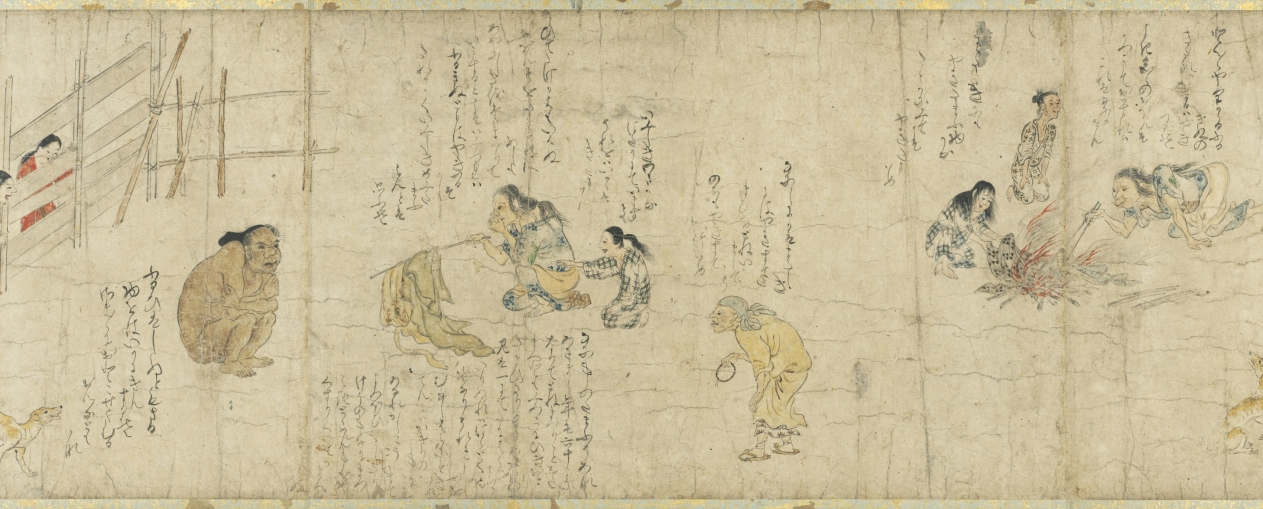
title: The Story of Fukutomi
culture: Japan, Muromachi period (1392–1573)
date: mid-1400s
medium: Handscroll; ink and color on paper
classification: Painting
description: This handscroll shows the second half of an odd tale in which a ne’er-do-well seeks the path to quick fortune and learns the art of musical flatulence. Prior to a major performance, a mentor (and competitor) advises him to consume morning glory seeds, a laxative. Thus, while performing he fouls himself and ends his days in humiliation. The audacious nature of this story and its presentation—well-animated figures with dialogue adjacent to the appropriate moments of action—create a primitive graphic novel. Japanese visual humor about farting preceded this story, but the satirical, mean-spirited twist in this tale suggests its intent was not merely to be humorous. The story was likely commissioned by court officials who disapproved of common performers rising to high positions, outflanking what was the accepted social order.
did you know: This scroll is treasured as the second oldest surviving version of this story.